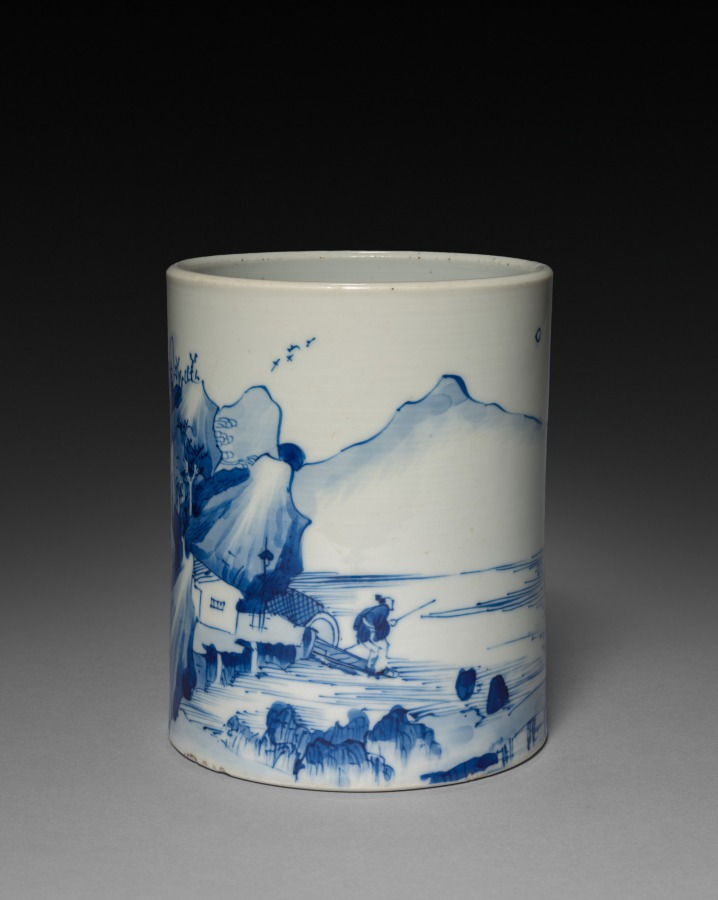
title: Brush Pot with Landscape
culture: China, Jiangxi province, Jingdezhen kilns, Qing dynasty (1644-1911), Kangxi reign (1662-1722)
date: 1662–1722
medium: porcelain with underglaze blue decoration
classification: Ceramic